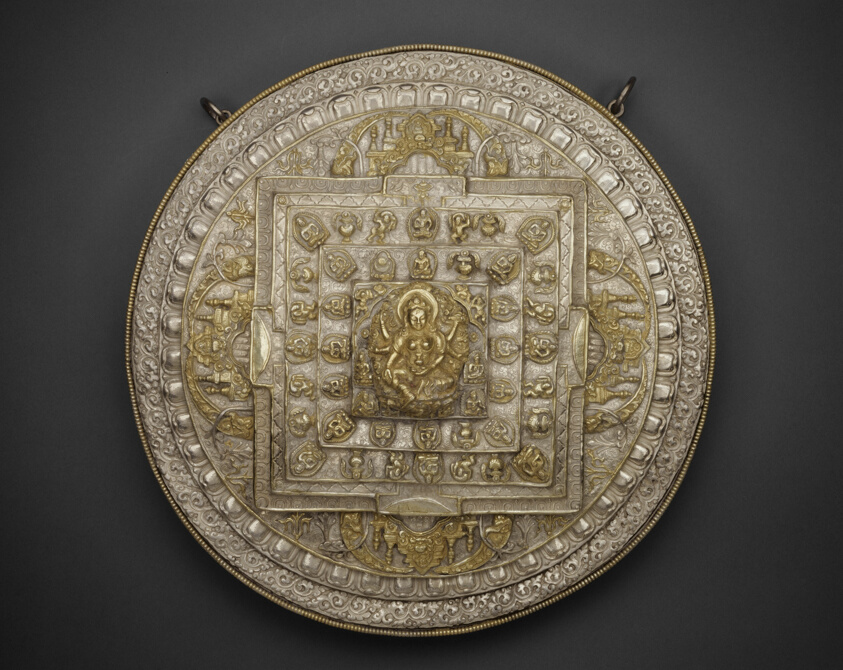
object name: Religious/Ritual Object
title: Tiered Offering Mandala of the Goddess of Wealth (Vasudhara)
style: Himalayan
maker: Nepal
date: 19th century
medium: Silver repoussé and gilt copper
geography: Nepal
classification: metalwork; silver; asian art; ritual objects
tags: goddesses, wealth, religious figures, gems, deities, abundance, Nepal, geometric, mandala, Tibet